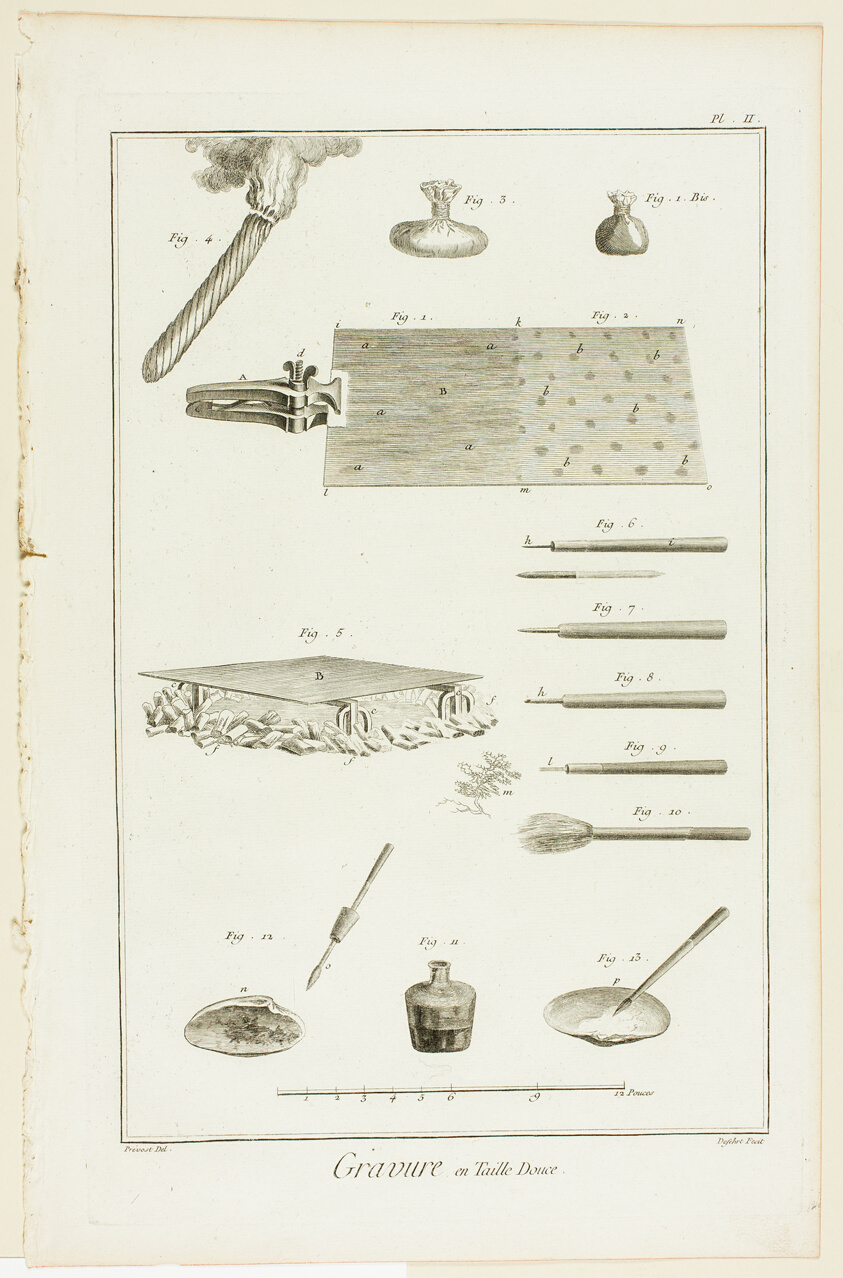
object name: Print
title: Copperplate Engraving, from Encyclopédie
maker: A. J. Defehrt (French, active 18th century); after Benoît-Louis Prévost (French, c. 1735-1809); published by André le Breton (French, 1708-1779), Michel-Antoine David (French, c. 1707-1769), Laurent Durand (French, 1712-1763), and Antoine-Claude Briasson (French, 1700-1775)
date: 1762/77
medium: Engraving on cream laid paper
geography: France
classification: etching; print; prints and drawing